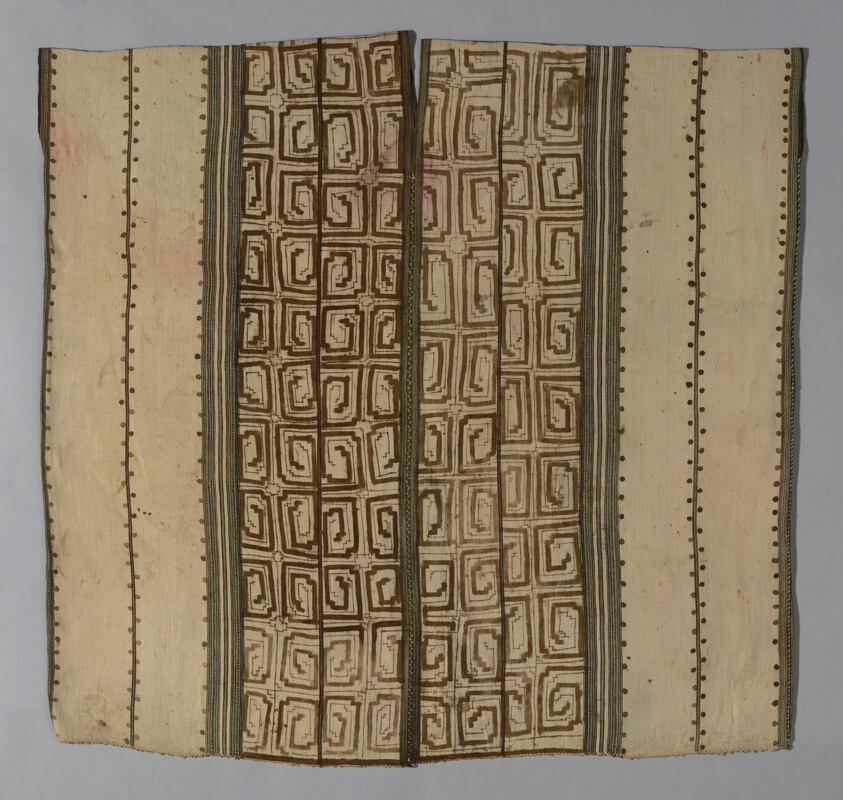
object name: Costume and Accessories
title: Tunic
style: peruvian, conibo, peru, shipibo, south american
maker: Shipibo-Conibo; Peru, Ucayali, Possibly Pucallpa region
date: c. 1900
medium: Cotton, plain weave; painted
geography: Peru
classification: tunic; weaving - printed; weaving; textile; costume; costume - weaving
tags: geometric motif